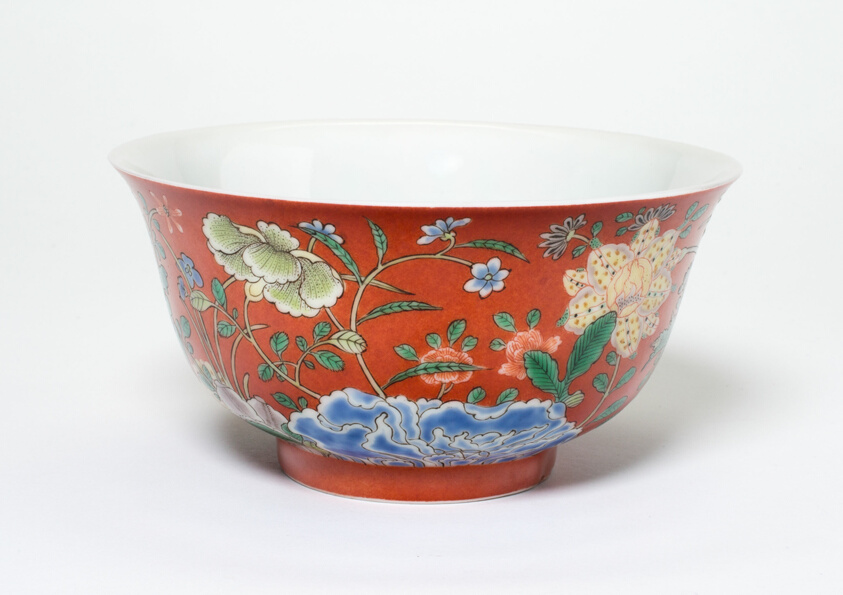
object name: Vessel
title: Bowl with Flowers on a Coral-Red Ground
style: Chinese (culture or style)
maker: China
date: Qing dynasty (1644–1911), Yongzheng reign mark (1723–1735)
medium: Porcelain painted in overglaze enamels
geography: China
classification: bowl; porcelain; dish (vessel); asian art; ceramics; vessel